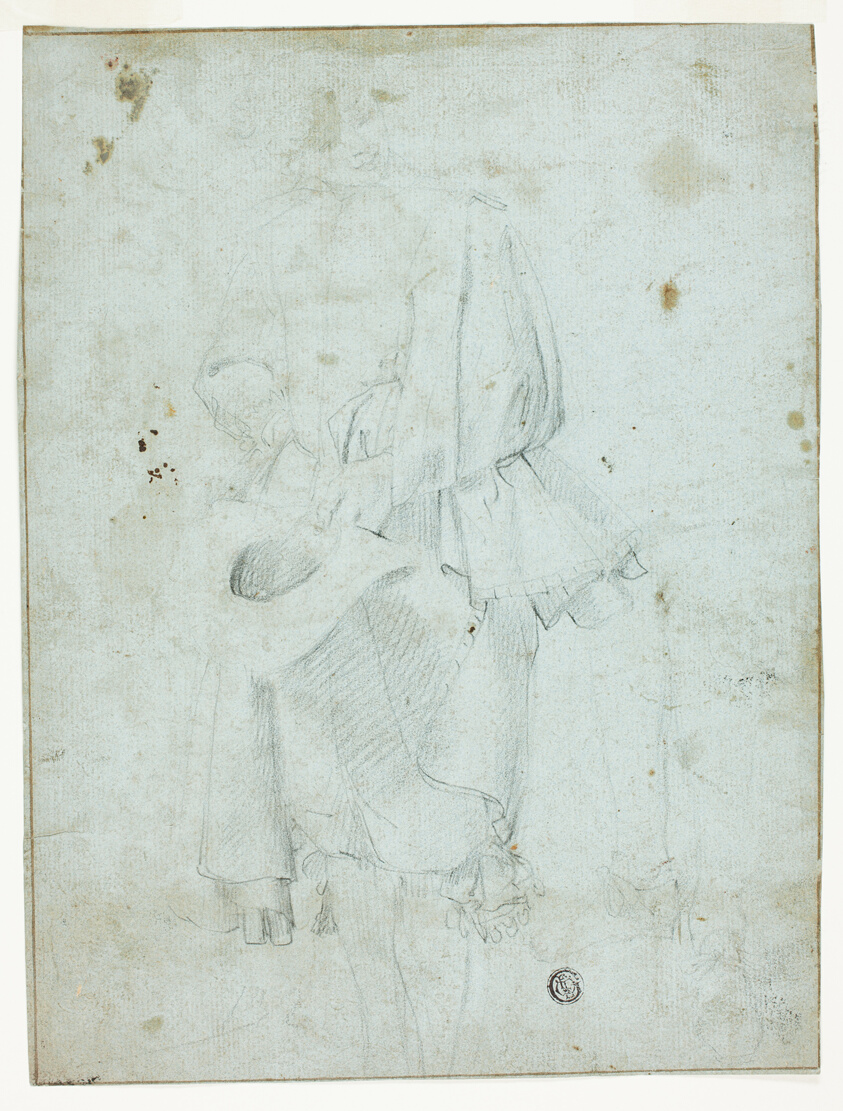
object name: Drawing and Watercolor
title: Standing Youth Holding Hat, and Sketch of Legs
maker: Probably Domenico Fiasella (Italian, 1589-1669); or possibly Lodovico Carracci (Italian, 1555-1619); or possibly the style of Justus Suttermans (Flemish, 1597-1681)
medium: Black chalk on blue laid paper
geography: Italy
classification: graphite; drawings (visual works); prints and drawing